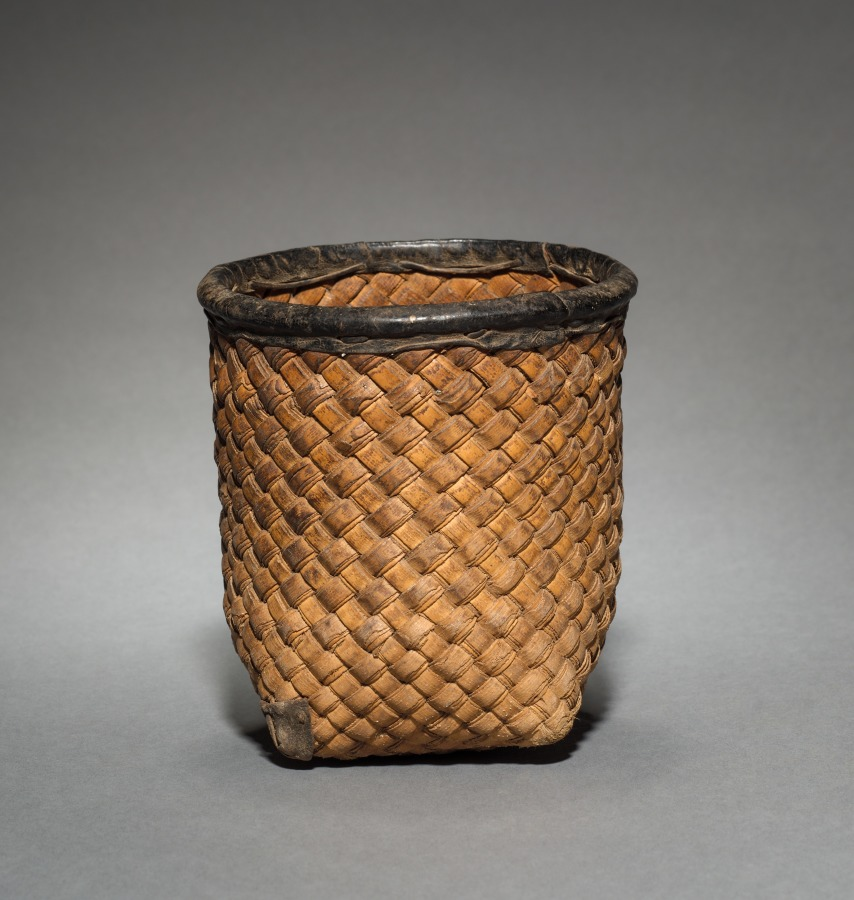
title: One of Ten Nesting Wedding Baskets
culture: Africa, Western Sudan, Burkina Faso, Lobi, 20th century (?)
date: c 1900s ?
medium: Plant fiber and leather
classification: Vessels